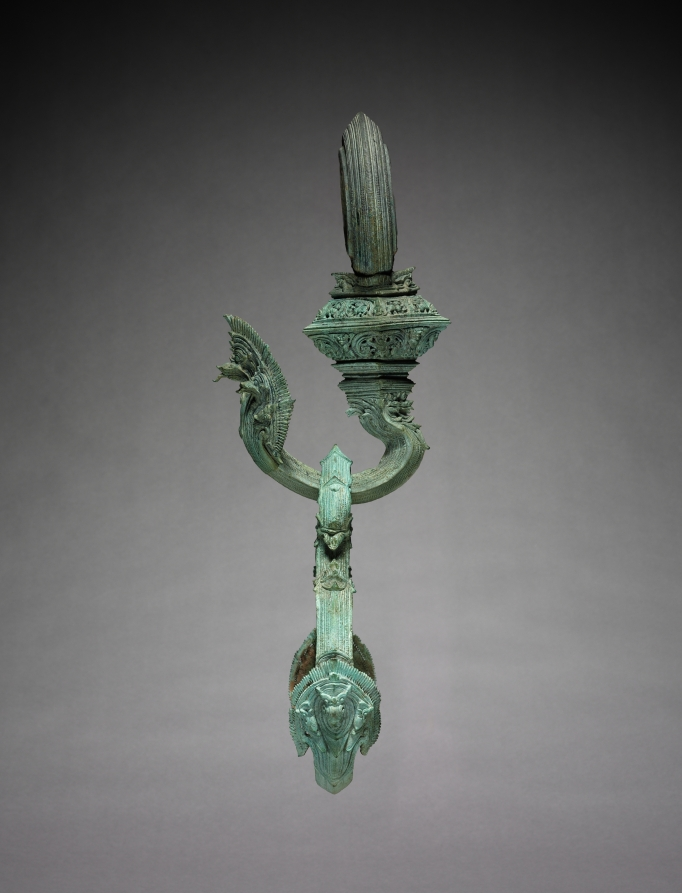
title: One of a Pair of Decorated Palanquin Hooks and Rings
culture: Cambodia, Angkor Wat Style, 12th century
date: 1100–1175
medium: bronze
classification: Sculpture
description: Hooks, suspension rings, and finials cast in bronze are very common fixtures in Cambodian decorative art. Frequently they served a practical function, such as the present set, used for a palanquin in which a person was carried from place to place. The litter or throne was fastened to the rings which in turn were suspended from the books fixed by bolts to transverse poles carried on the shoulders of the palanquin bearers. Chariots, palanquins, furniture, and harnesses were frequently embellished with various bronze decorations, finials, and fixtures. Those, as a rule, were gilded, making the objects they served look very sumptuous. The relief sculpture found on various Khmer monuments, such as Angkor Wat or Bayon, illustrates well the use and context of those bronze implements in ancient Cambodian life. These frequently elaborate bronze fixtures were decorated with motifs generally popular in Cambodian art: such as nagas, garudas, floral, or animal patterns. This pair of hooks and rings, unusually large in size, take on a naga form in the hooks. They are decorated with perforated floral and animal motifs done with great care and precision. The rings, suspended from hooks, are in the form of tri-fold flower stalks with naga motifs repeated at the end of the curved stalks. Such elaborate and huge hooks and rings must have no doubt decorated a palanquin of an important individual, possible a ruler himself. Their decoration is typical of the mature Angkor Wat style.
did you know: The naga, a water serpent with a multiheaded hood, is a Khmer national emblem.